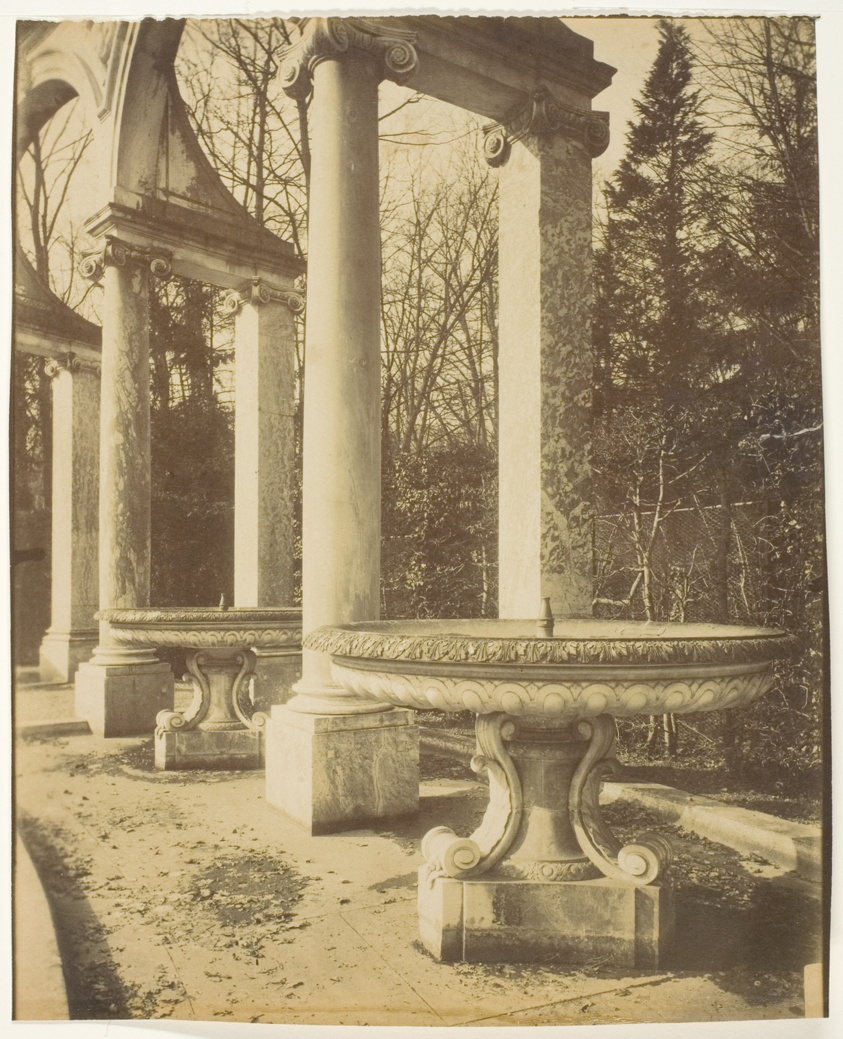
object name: Photograph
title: Parc de Versaille bosquet de la Colonnade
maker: Jean-Eugène-Auguste Atget (French, 1857–1927)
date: 1905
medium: Albumen print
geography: France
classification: photograph; albumen silver print; photography